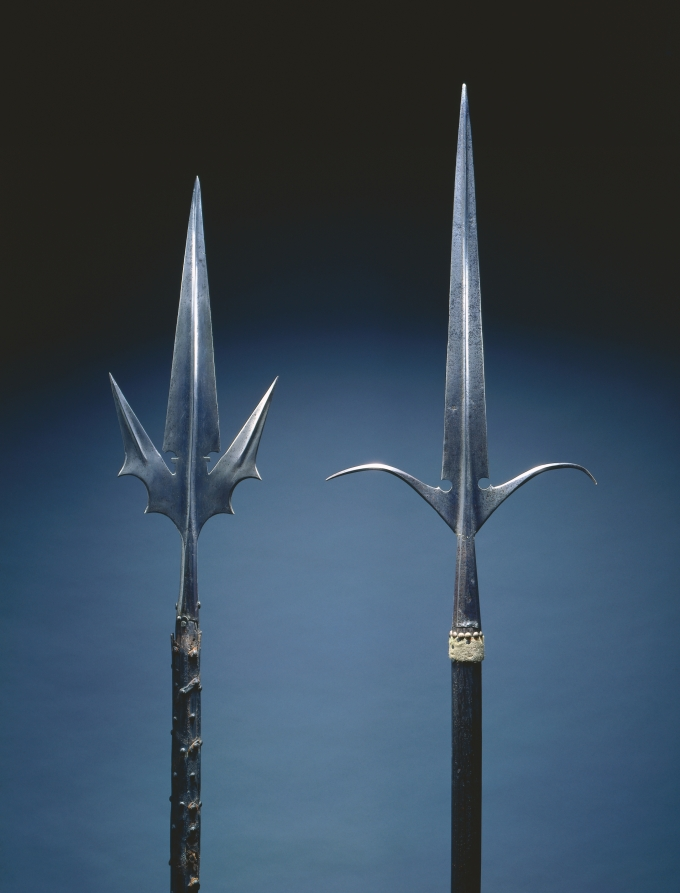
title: Corsèque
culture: Italy, Venice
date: c. 1520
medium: steel; round wood haft; tassel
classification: Arms and Armor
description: The corsèque is a pole arm with a symmetrical three-pronged head consisting of a central double-edged blade and two sharp, upturned wings. The side blades served several functions: as guard to protect the soldier's hand when a thrust was delivered with the central blade; as a hook for unseating a mounted opponent; and to trip the opponent's horse. The corsèque was used mostly in Italy and France from the 1400s to the early 1600s. The version here is sometimes called a chauve-souris after the French word for "bat," since the side blades are thought to resemble a bat's wings.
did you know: The corsèque is said to have originated in Corsica, from where it takes its name.